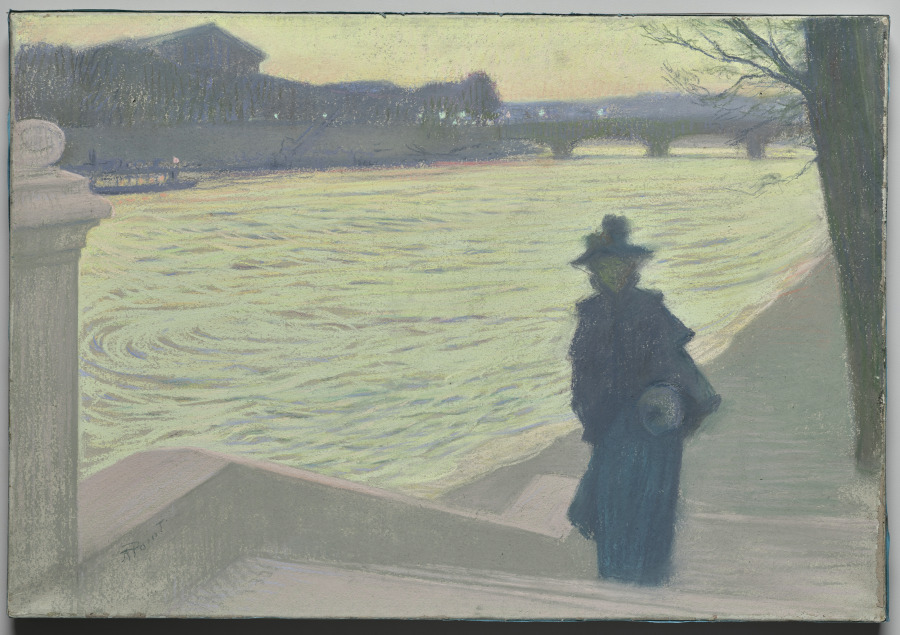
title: Quais de Seine en nocturne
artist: Armand Point (French, 1861–1932)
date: c. 1890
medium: pastel on gray wove paper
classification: Drawing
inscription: Signed, lower left, in pastel: APoint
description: Algerian-born artist Armand Point became involved in the Symbolist movement—which combined formal experimentation and imaginative subjects—while working in Paris during the 1890s. This drawing is one of many in which he represented his longtime companion and model, Hélène Linder. Here, she appears silhouetted against the brilliant reflection of setting sun on the city’s Seine River with swirling marks and bold tones that suggest the mood of the city as day transformed to night.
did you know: The walkways along the Seine River that this drawing depicts were a recent addition, constructed as part of a major redesign of Paris spearheaded by Baron Haussmann, a French official, during the mid-1800s.